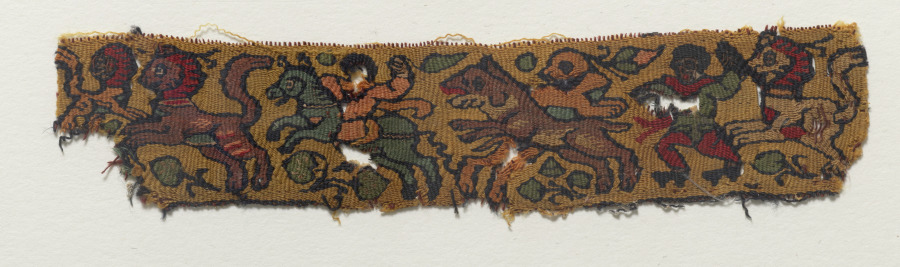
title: Three Fragments from a Border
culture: Egypt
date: before 1968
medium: Wool and linen: tapestry weave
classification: Textile